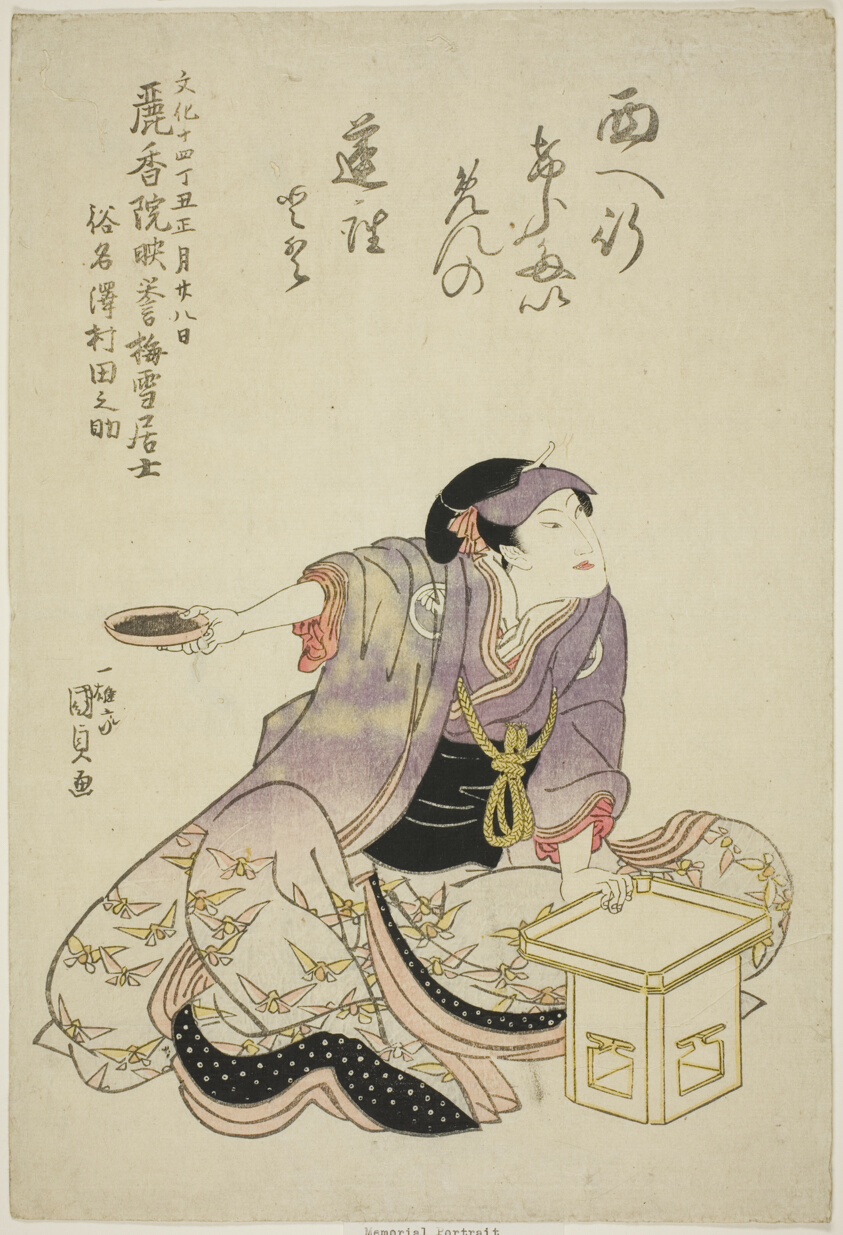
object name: Print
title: Memorial Portrait of the Actor Sawamura Tanosuke II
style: Japanese (culture or style)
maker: Utagawa Kunisada I (Toyokuni III) (Japanese, 1786-1864)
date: 1817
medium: Color woodblock print; oban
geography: Japan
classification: print; asian art